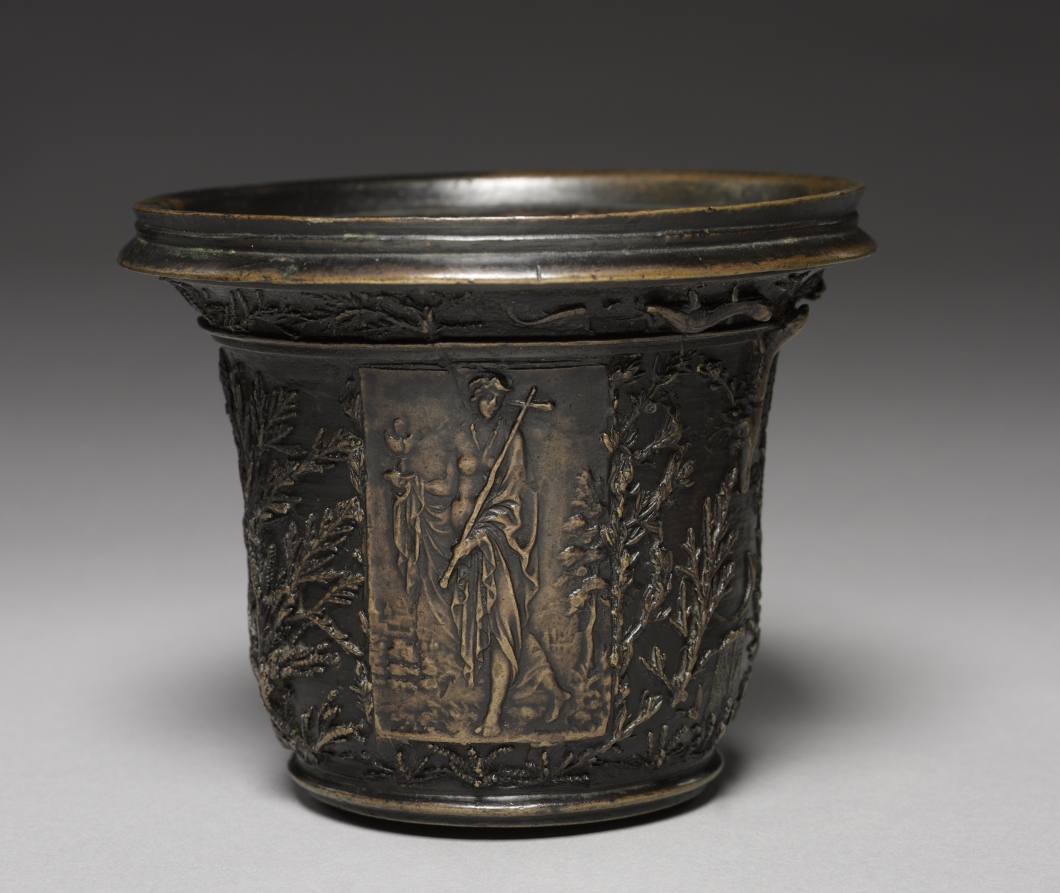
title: Mortar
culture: Germany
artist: workshop of Wenzel Jamnitzer I (German, 1508/09–1585)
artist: with plaquettes cast after models by Peter Flötner (German, 1485–1546)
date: c. 1550–1560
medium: bronze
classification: Sculpture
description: Three reliefs curiously combine faith, hope, and vanity. They were made after works by Peter Flötner (more refined plaquettes by the artist are also in the museum's collection), then incorporated into the vessel. The plants and small reptiles were cast from life, an example of the strong interest in natural history in Renaissance Nuremberg. This tradition relates closely to the French ceramics by Palissy, also in the collection, which likewise incorporate natural specimens.